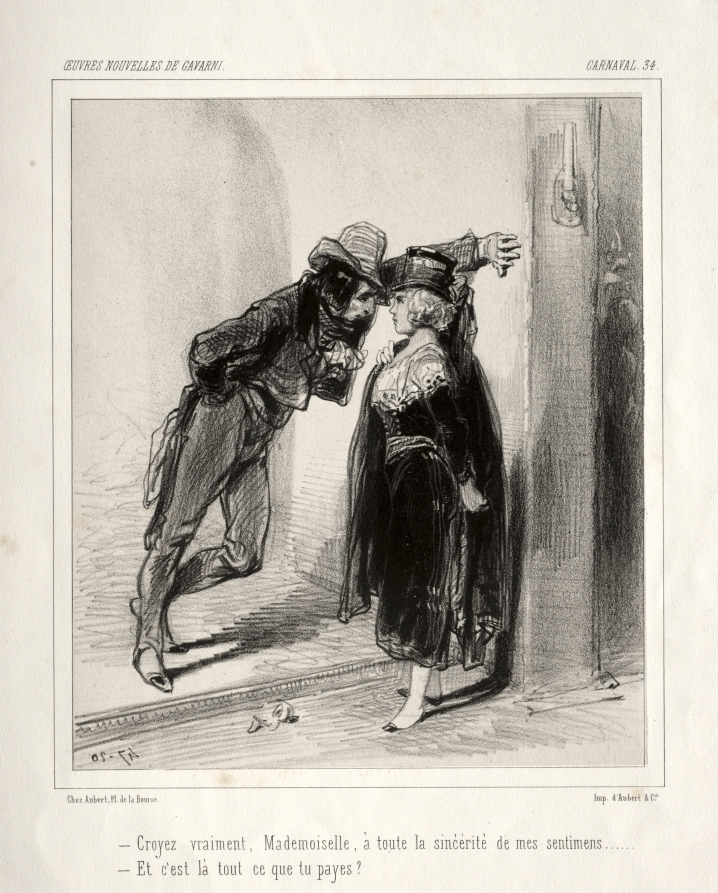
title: Carnaval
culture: France, 19th century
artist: Paul Gavarni (French, 1804–1866)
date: c. 1841–47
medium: lithograph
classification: Print